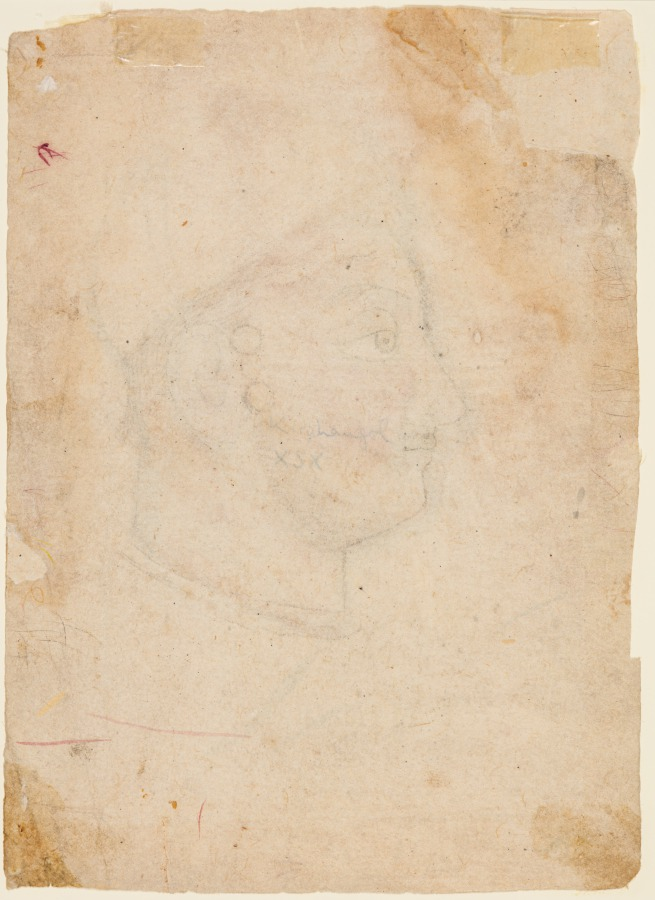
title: Drawing of a Man’s Head with an Unusual Turban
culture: Northwestern India, Rajasthan, Rajput Kingdom of Kishangarh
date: c. 1780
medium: gum tempera and gold on paper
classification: Painting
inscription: Nagari number ‘126’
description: The painting is a study of a man’s head, perhaps for a finished portrait. It was a common practice among artists to make preparatory sketches of people, to be manifested in later portraits. The artist has rendered the drawing with heavy outline on the eyebrows, eye, and moustache, while soft tones are employed for the modelling of the face.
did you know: The man in the study appears to be a Hindu Rajput noble.